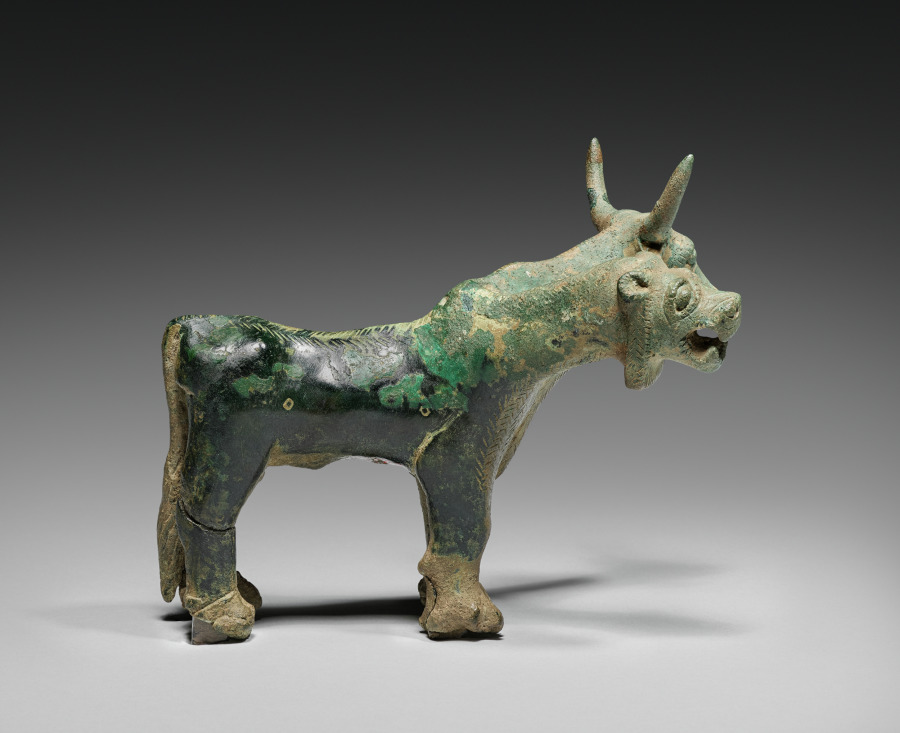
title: Composite Lion and Bull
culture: Iran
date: 1500–1000 BCE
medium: bronze, cast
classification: Sculpture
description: Combining the strength of the lion and the fertility of the bull, this creature must have served as an object of worship in a temple or shrine.